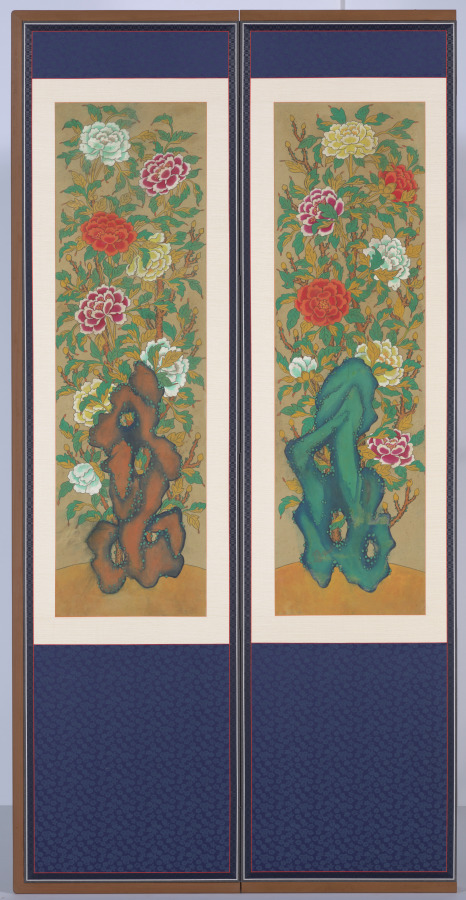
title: Peonies and Rocks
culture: Korea, Joseon dynasty (1392−1910) or Japanese colonial period (1910−1945)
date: early 1900s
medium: Six-panel folding screen; ink and color on silk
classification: Painting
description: By the late nineteenth century, peony paintings with bold designs and striking graphic stylization were increasingly produced and consumed by middle-class members because of its symbolic meaning: prosperity and wealth.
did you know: In East Asian art, peonies traditionally symbolize prosperity and wealth.